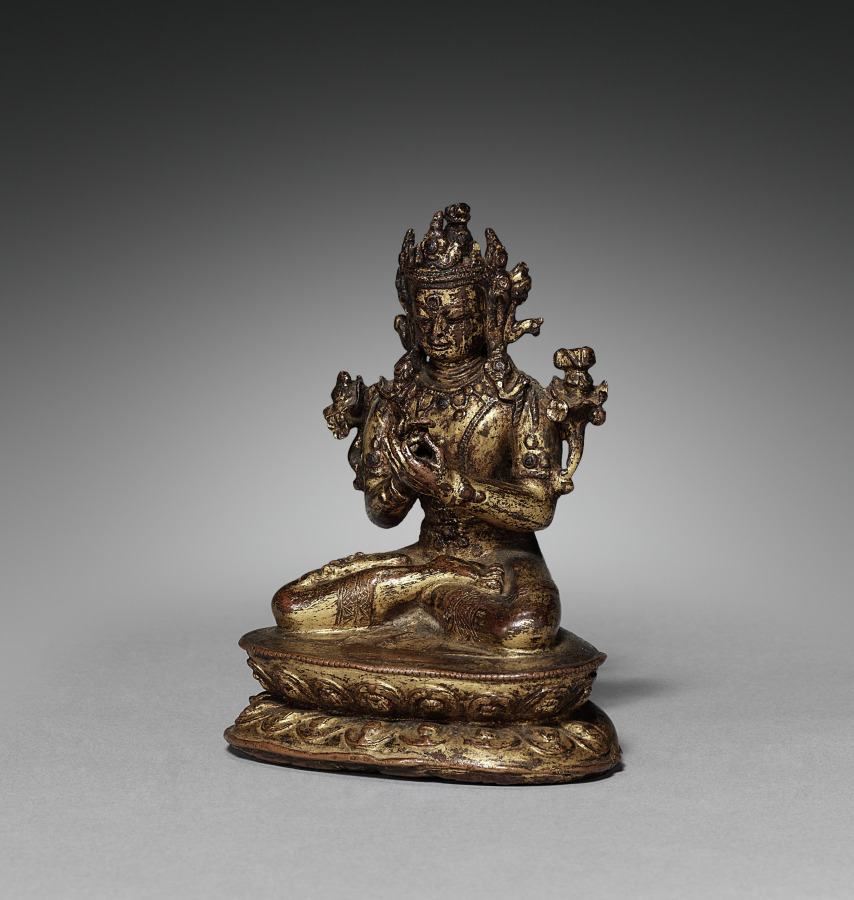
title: Manjuvara Turning the Wheel of the Law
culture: Nepal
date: 1300s–1400s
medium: gilded copper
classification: Sculpture